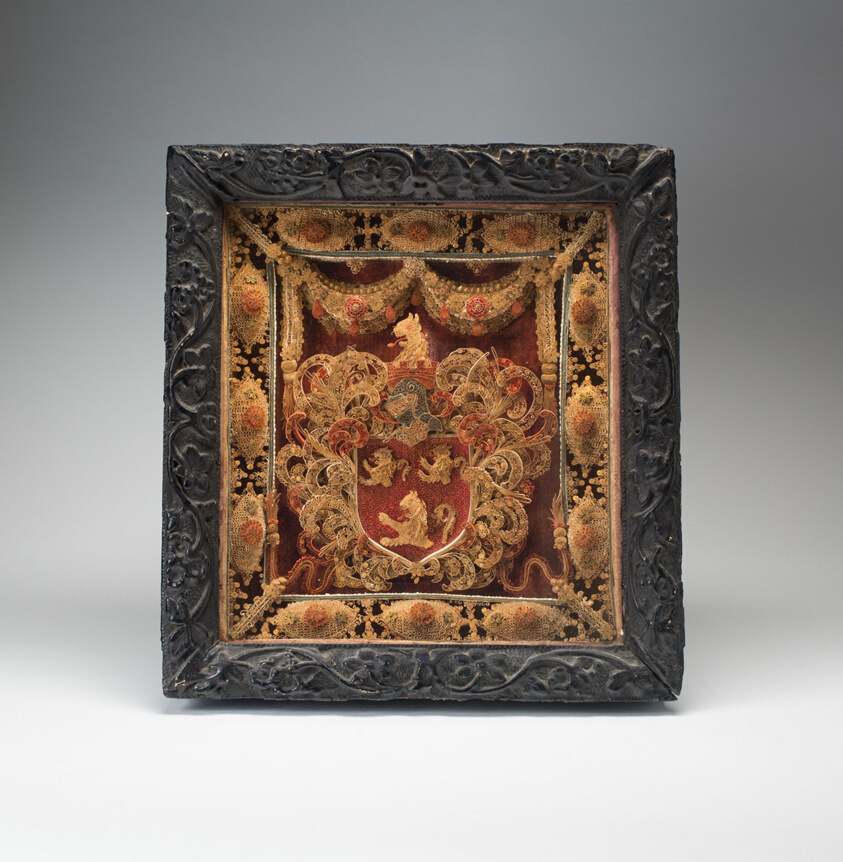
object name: Decorative Arts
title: Shadow Box with Coat of Arms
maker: England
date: Late 17th to early 18th century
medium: Rolled paperwork, colored and gilded; red velvet; wood frame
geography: England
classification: wallpaper; paper; european decorative arts; decorative arts